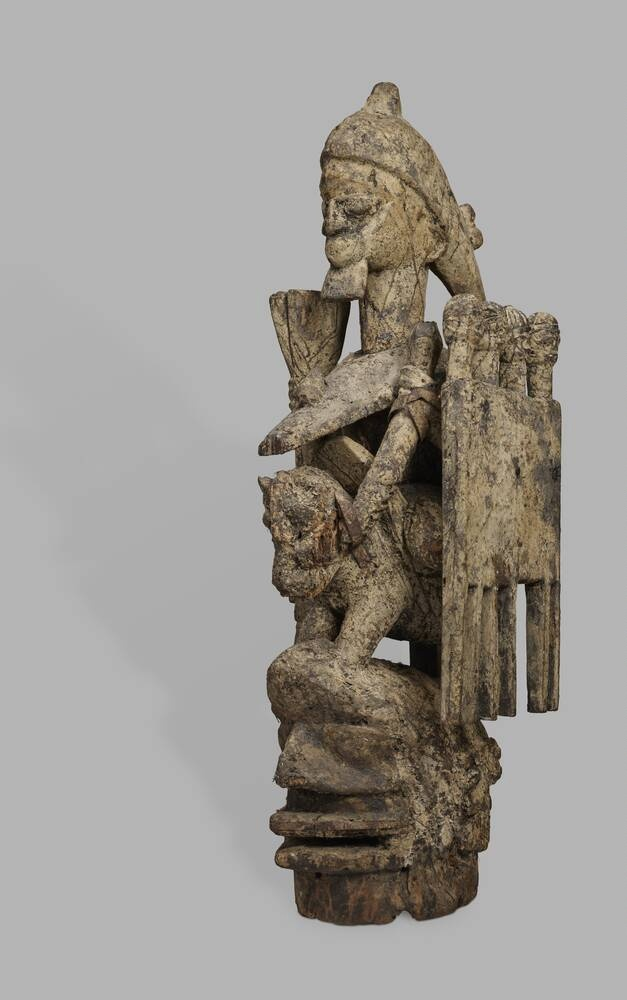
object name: Costume and Accessories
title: Headdress (Jagún Jagún)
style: yoruba, Arts of Africa, african Art, Coastal West Africa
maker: Yòrùbá; Ekiti region, Nigeria; Coastal West Africa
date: Mid– late 19th century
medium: Wood, iron, nails, fiber, and sacrificial materials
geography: Nigeria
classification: headdress; arts of Africa; shrine; ceremonial object; ritual objects; masks; costume; african art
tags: warriors, masks, animals, horseback riding, ritual, warfare